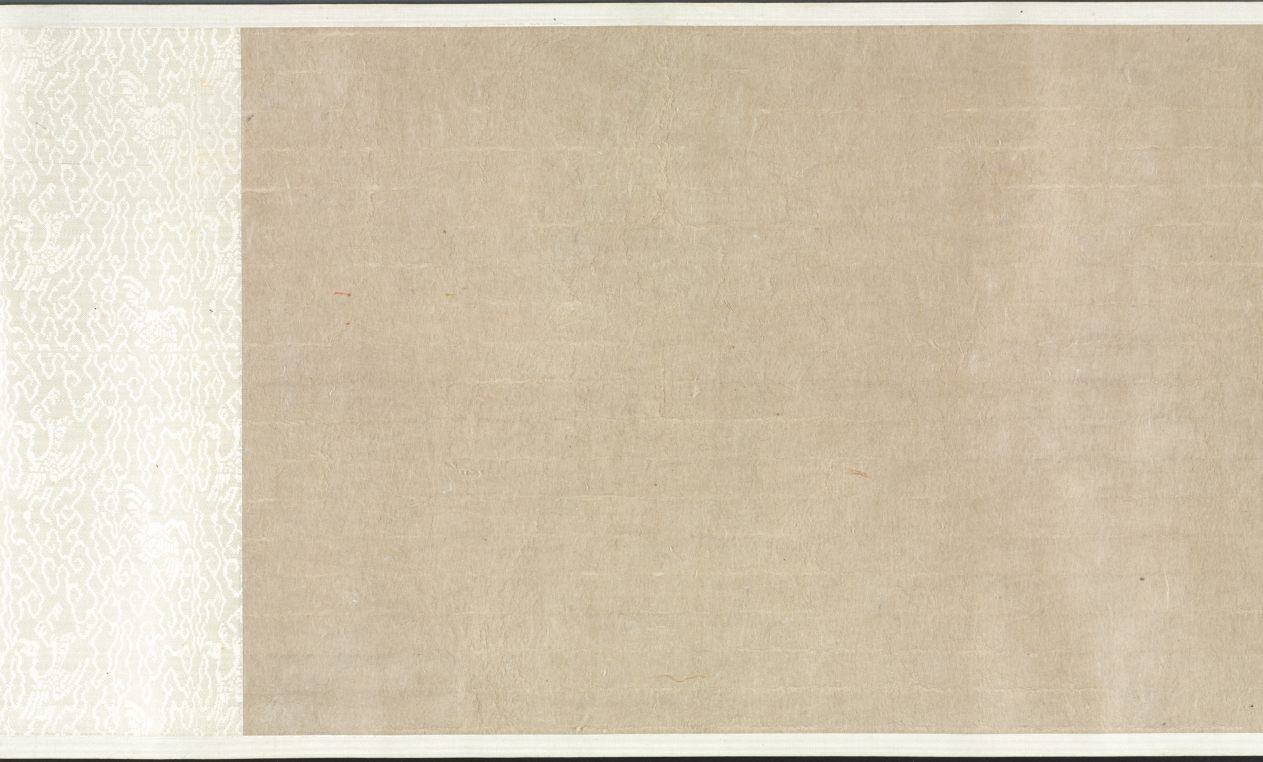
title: Buddha's Conversion of Five Bhiksu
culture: China, Yuan dynasty (1271–1368)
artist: Li Sheng (Chinese, active c. 1324–after 1375)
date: mid-1300s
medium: handscroll; ink on paper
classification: Painting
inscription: 紫篔生李升識 [印] 李氏子雲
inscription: 4 colophons and 12 additional seals: The "Heart" Sutra (Maha Prajnaparamita) text written by Wu Yuqing 吳餘慶 (active early 1400s); 2 seals of Xu Qianxue 徐乾學 (1631–1694); 3 colophons, one dated 1929 and two dated 1936, and 9 seals of Wu Hufan 吳湖帆 (1894–1968); 1 colophon, dated 1932, of Chen Dingshan; 1 seal unidentified.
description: This episode stems from the life of the historical Buddha, who, after his enlightenment, was initially hesitant about preaching his own doctrine. After much personal deliberation and prodding by deities, he finally relented. The first converts were the five guards who served him when he was still a prince. For Li Sheng, this is the pretext of the painting, which moves from the interaction of the bhiksu with the Buddha to a broader awareness of the vast surroundings of the scene.